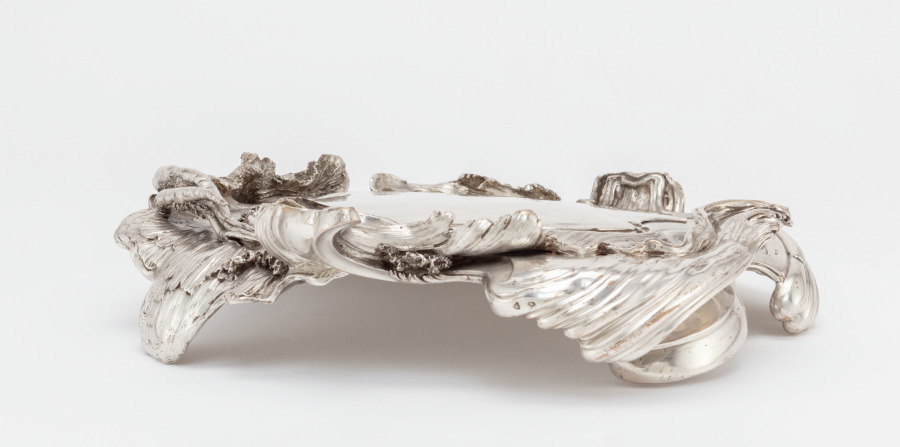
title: Stand for a Covered Tureen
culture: France, Paris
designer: Juste-Aurèle Meissonnier (French, 1695–1750)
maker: Pierre-François Bonnestrenne (French)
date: 1735–38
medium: silver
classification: Silver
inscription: engraved Meissonnier signature.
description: See entry for cover record 1977.182.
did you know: The langoustine, pigeon, and vegetables were cast using real examples giving the silver copies lifelike detail and appearance.